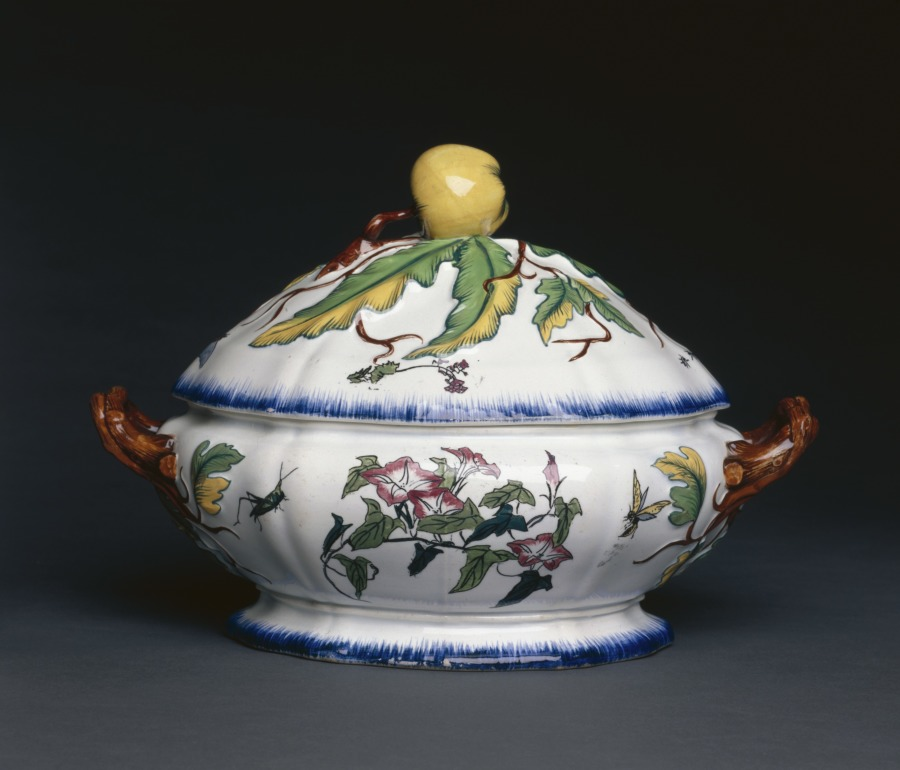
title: Covered Tureen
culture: France, Creil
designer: Félix Bracquemond (French, 1833–1914)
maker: Creil Factory (French)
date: 1866–75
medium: porcelain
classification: Ceramic